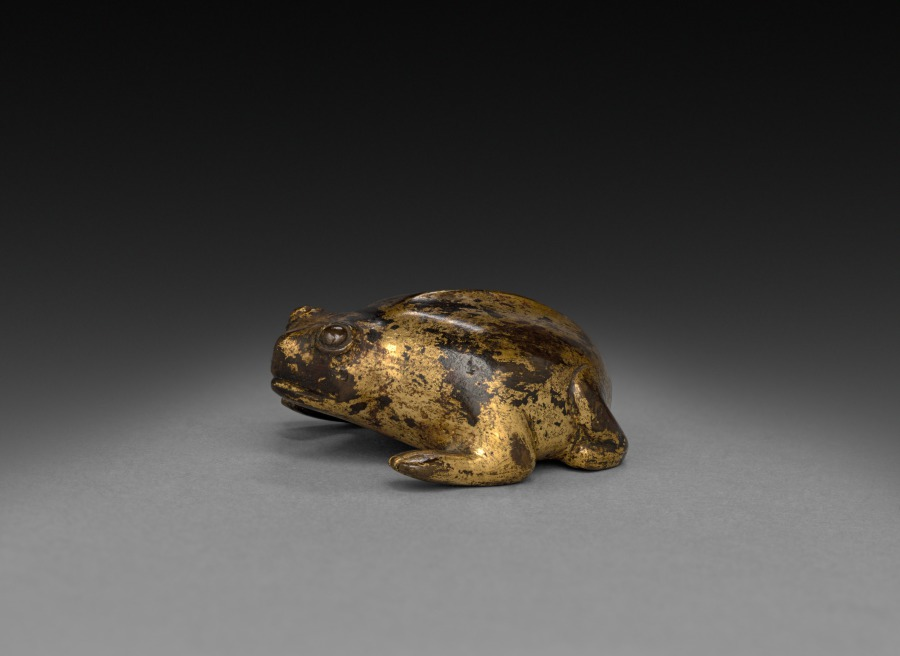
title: Toad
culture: China, Six Dynasties period (317-581), Northern Wei dynasty (386-534)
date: 386–534 CE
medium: gilt bronze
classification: Sculpture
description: In China, access to political power was granted to those who passed the civil service examinations, a system that offered official service only at a high level of education. Chinese literati-officials whose daily routine was administrative work in an office, enjoyed precious objects on their writing desks that offered distraction and demonstrated good taste. By the Ming (1368–1644) and Qing (1644–1911) dynasties, these utensils of the literati studio became also collectibles and were treasured as artworks. Desk objects included paper weights, like this bronze frog, seals, seal paste boxes, brush rests, wrist rests, brush holders, water droppers, ink cakes, miniature mountains, and albums, all ranging in material from jade, gilt bronze, lacquer, and wood to porcelain.